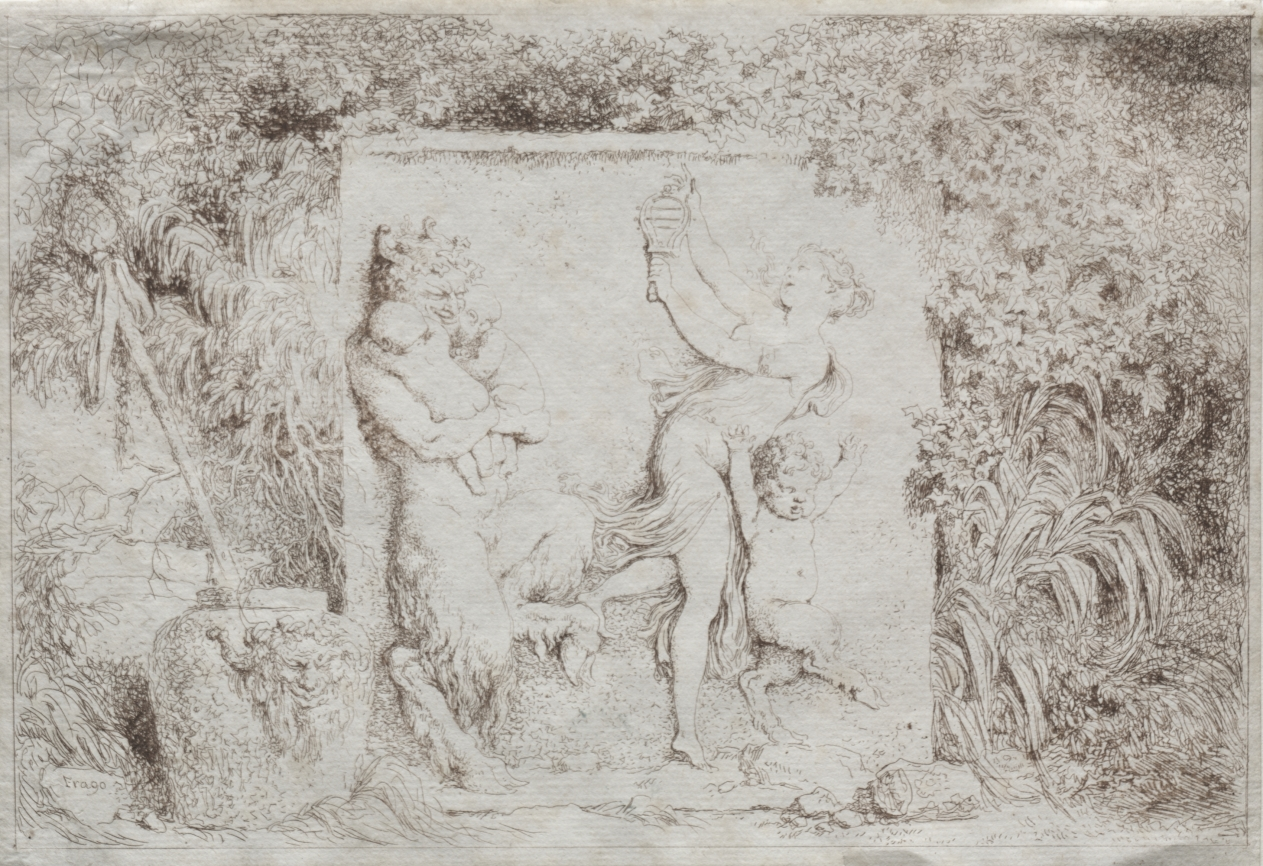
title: Bacchanal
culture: France, 18th century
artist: Jean-Honoré Fragonard (French, 1732–1806)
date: 1763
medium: etching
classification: Print